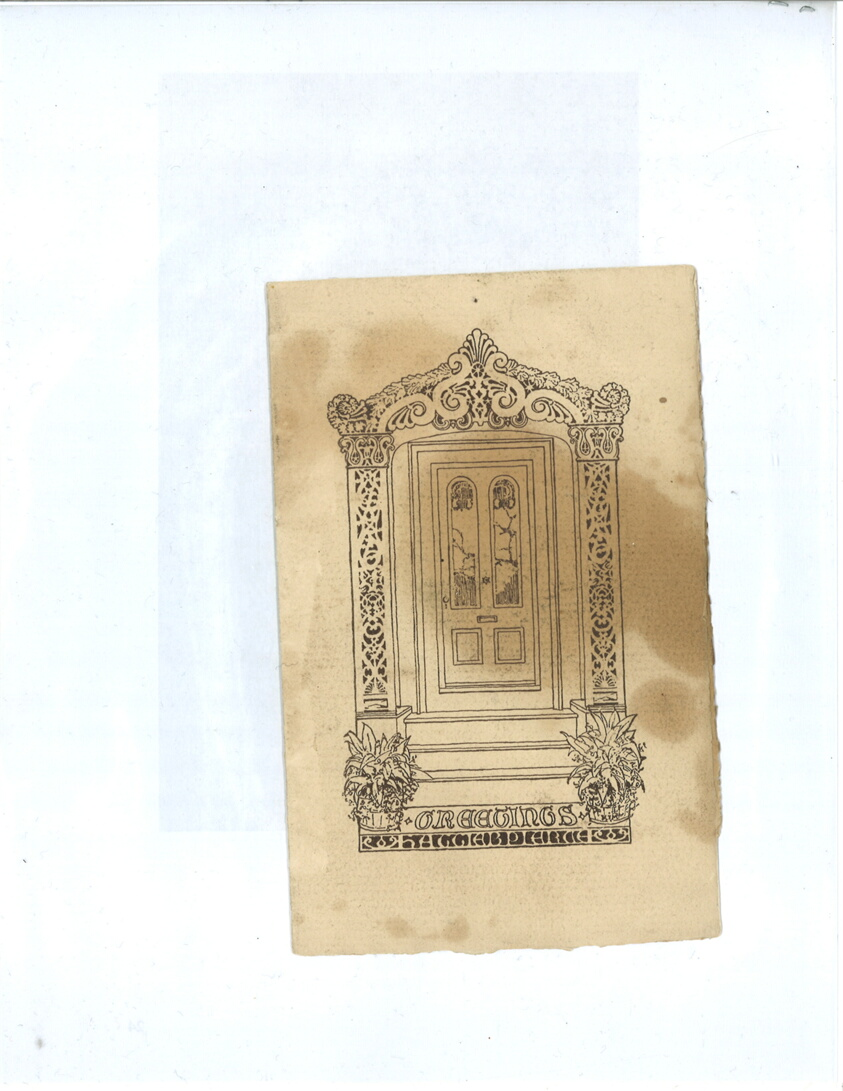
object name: Decorative Arts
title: Letterpress print (as companion to Doorframe, 2008.554)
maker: Artist unknown; American, 19th century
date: 1850/1900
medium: Ink on paper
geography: United States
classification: ink; decorative arts; prints and drawing